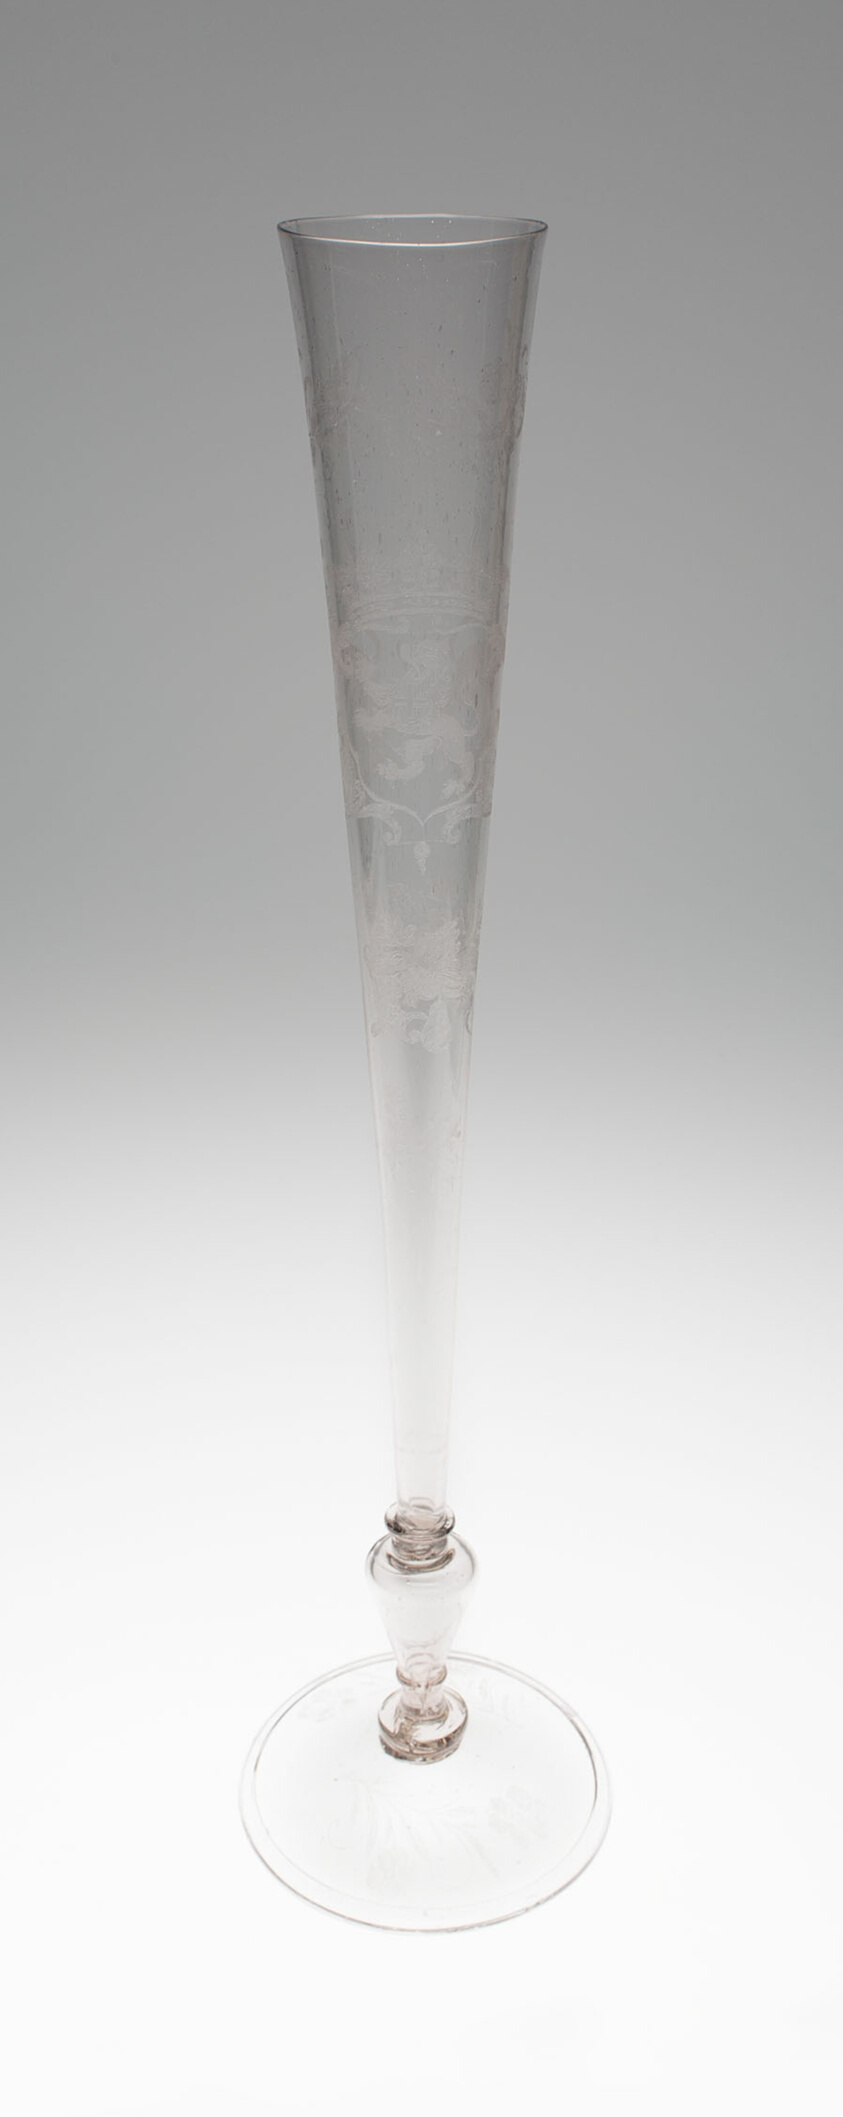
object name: Glass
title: Flute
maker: Netherlands or Belgium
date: c. 1660/80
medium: Glass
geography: Netherlands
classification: drinking vessel; glass; european decorative arts